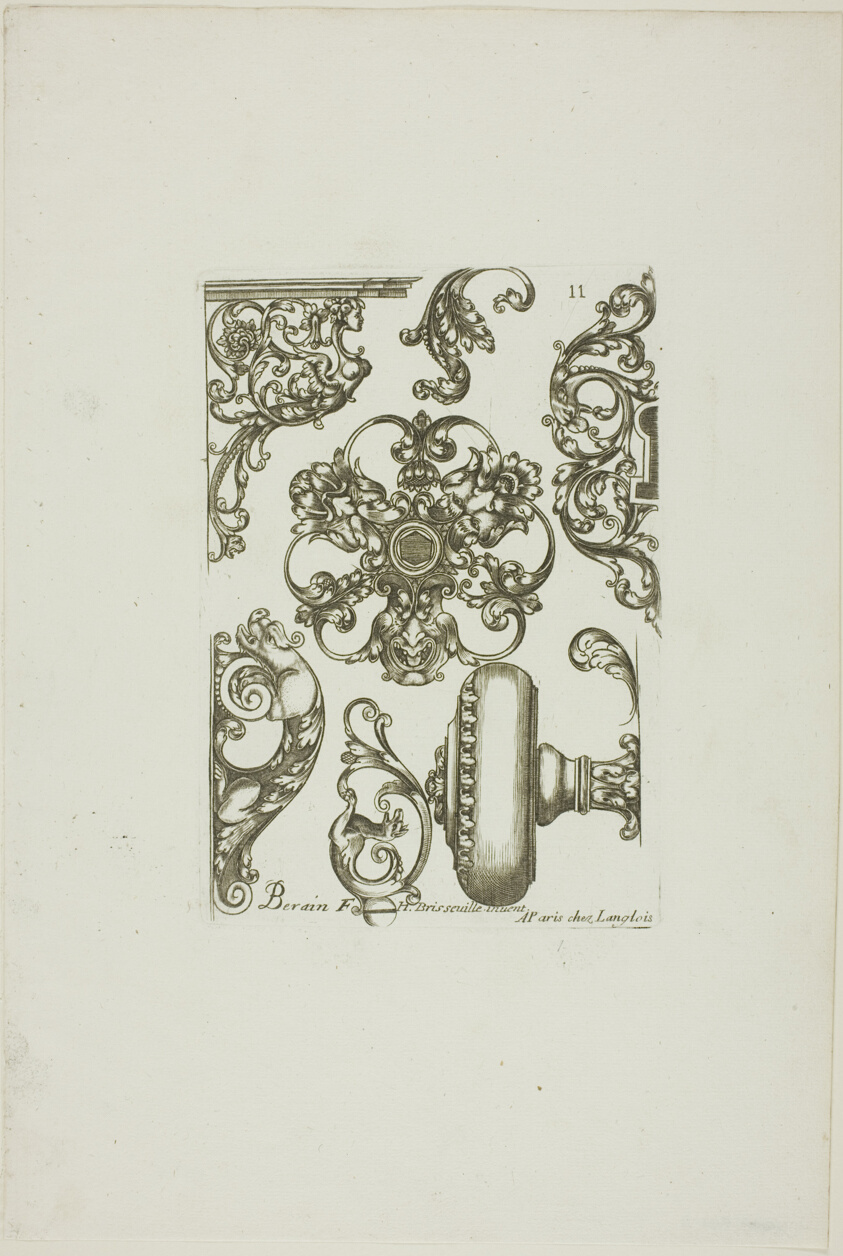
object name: Print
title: Designs for Locksmiths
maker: Jean Bérain I (French, 1640-1711); after Hugues Bris e Ville (French)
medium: Etching on paper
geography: France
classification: etching; print; prints and drawing